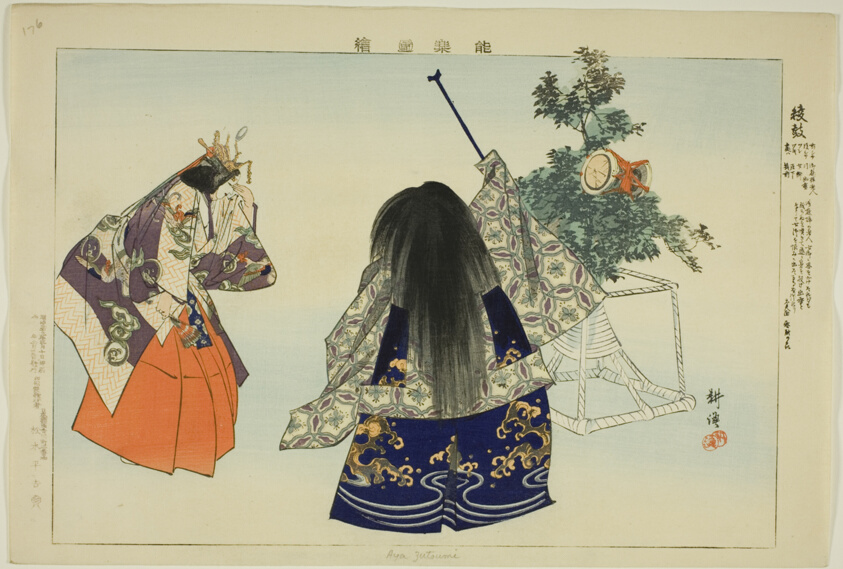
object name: Print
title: Aya no Tsuzumi, from the series "Pictures of No Performances (Nogaku Zue)"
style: Japanese (culture or style)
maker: Tsukioka Kogyo; Japanese, 1869-1927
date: 1898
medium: Color woodblock print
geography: Japan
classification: woodblock print; print; asian art